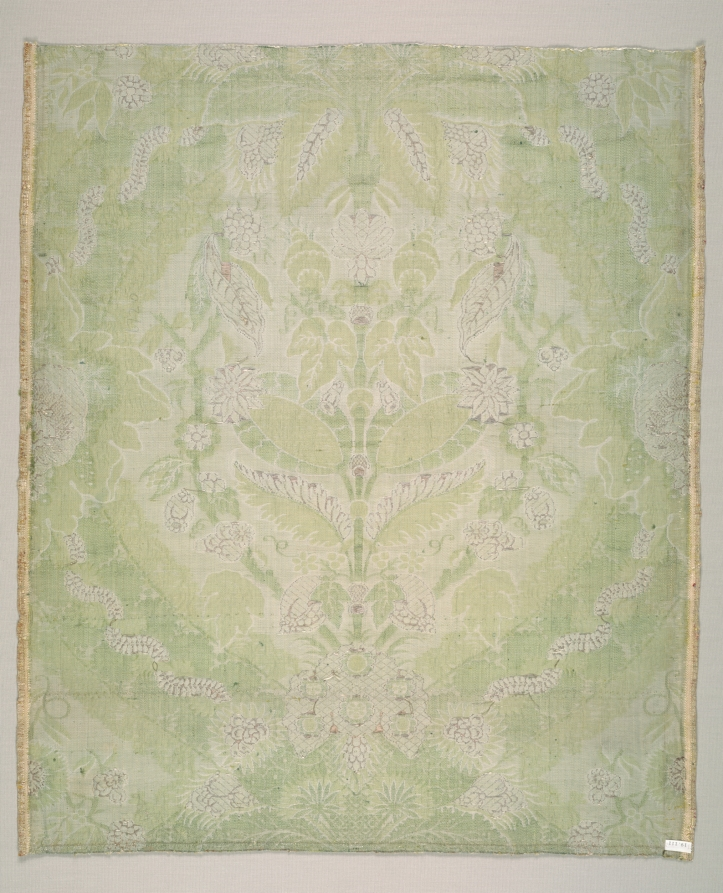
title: Textile Fragment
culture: France, 18th century, late Baroque period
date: c. 1720–1750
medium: lampas weave; silk and silver thread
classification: Textile